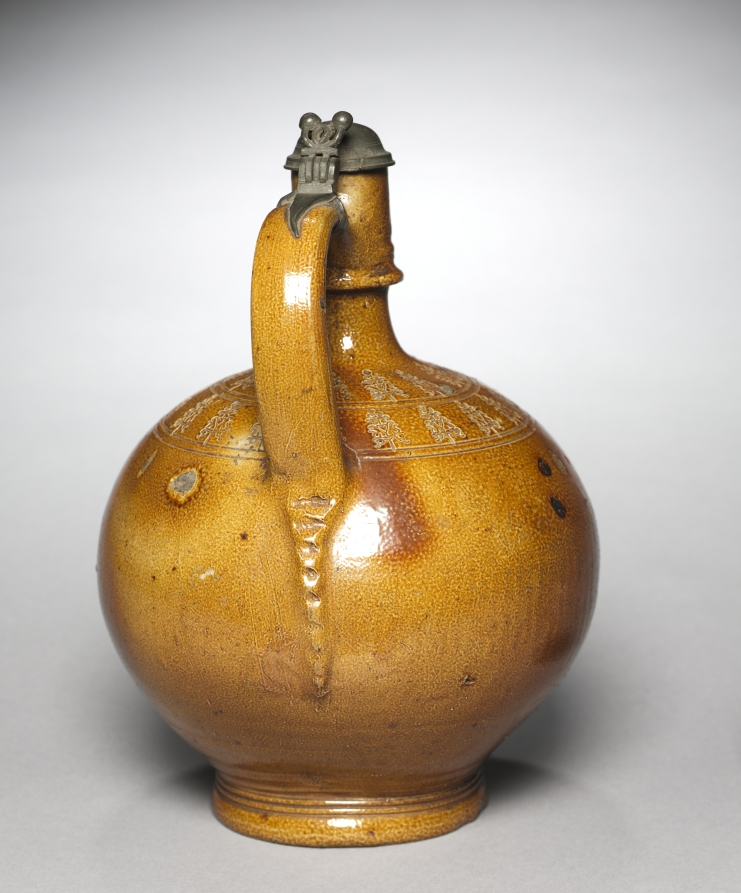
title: Jug with Pewter Lid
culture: Germany, Raeren, 17th century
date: 1602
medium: stoneware, brown glaze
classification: Ceramic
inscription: above the figure of a woman: 1602; above the left griffin: G / E ; above the right griffin: V / S.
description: German Stoneware The production and export of German stoneware reached its peak in the late 1500s. Prized for its durability and stone-like appearance, German stoneware became one of the most widely traded forms of pottery, even finding popularity in early America. The distinctive pebbly glass surface, resembling an orange peel, was achieved by introducing salt into the hot kiln during the firing process. This glaze gave clear definition to the coats of arms or other emblems that often formed the surface decoration on large works, usually jugs.